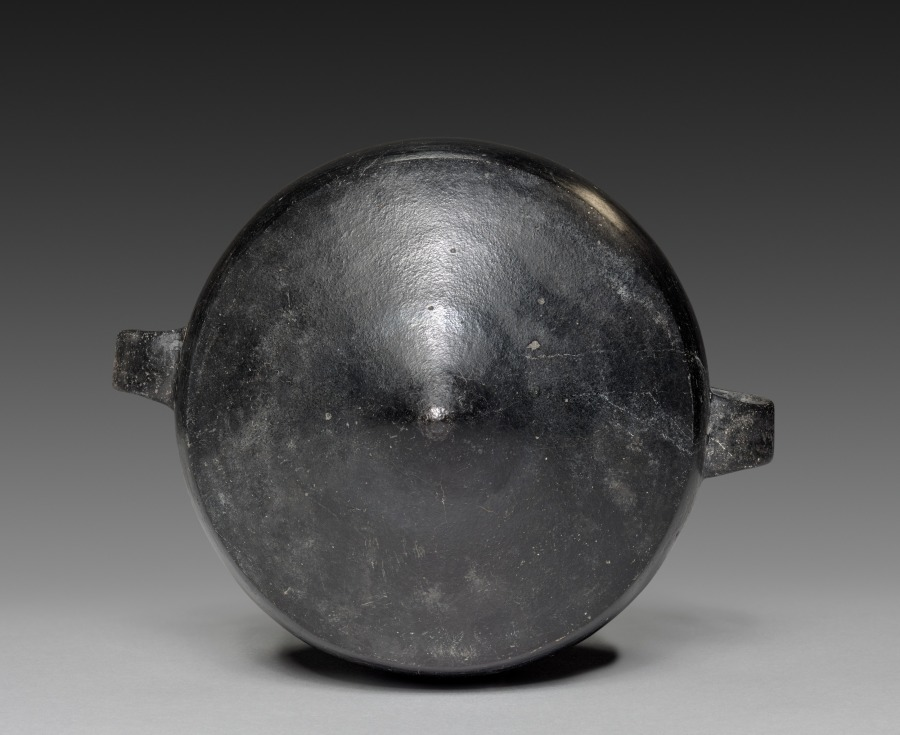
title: Hunchback Vessel (Aryballos)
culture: Central Andes (Peru), Chimú-Inka style, Late Horizon period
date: 1470–1521 (Thermoluminescence date, 1315–1615)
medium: ceramic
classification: Ceramic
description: This handsome vessel, along with the nearby double-chambered vessel, were made on the north coast after the Inka conquered the Chimú in the 1460s. Under Inka rule, many aspects of Chimú ceramic technology continued but new forms and subjects were introduced, such as the aryballos, a classic Inka vessel type. This example takes the form of a hunchback and may refer to the Inka predilection for employing hunchbacks as royal servants.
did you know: Hunchbacks seem to have functioned as servants in Inka royal palaces.